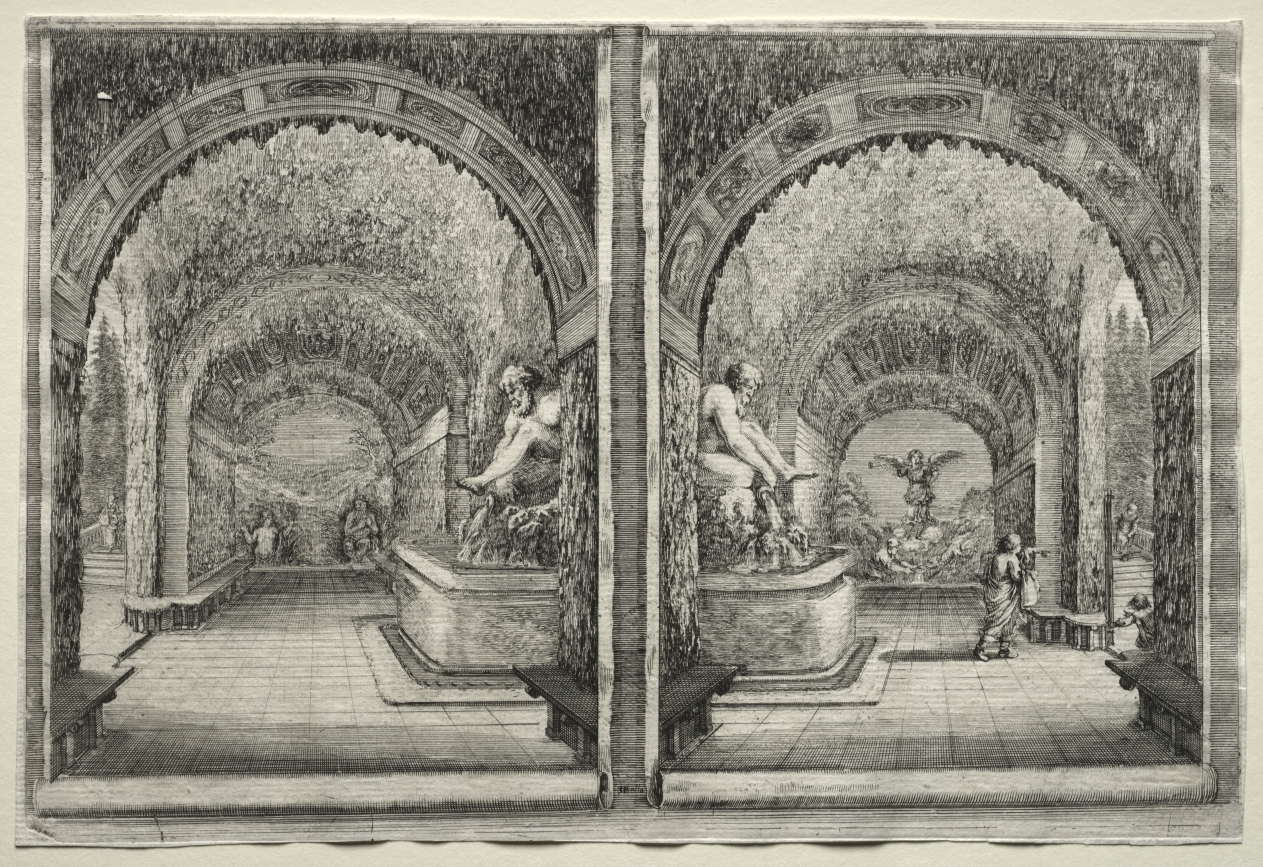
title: Views of the Villa of Pratolino: Two Views of the Grotto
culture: Italy, 17th century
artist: Stefano Della Bella (Italian, 1610–1664)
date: c. 1653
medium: etching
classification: Print